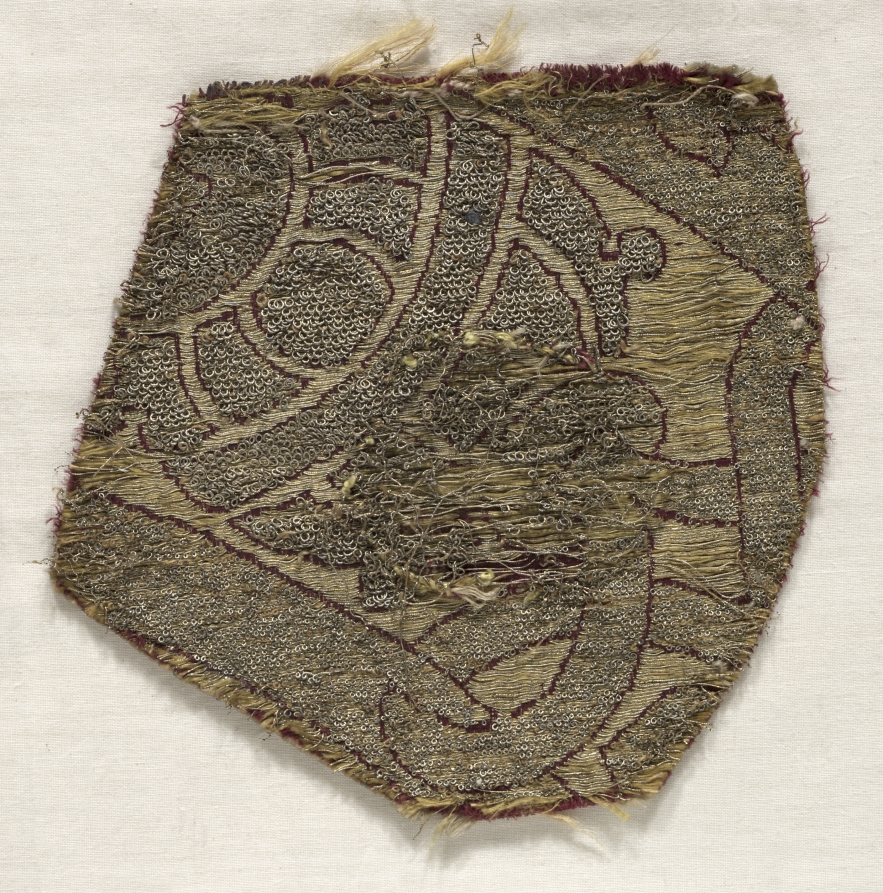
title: Fragment of Gothic Velvet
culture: Spain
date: 1400s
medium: velvet; silk and metallic thread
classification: Velvet